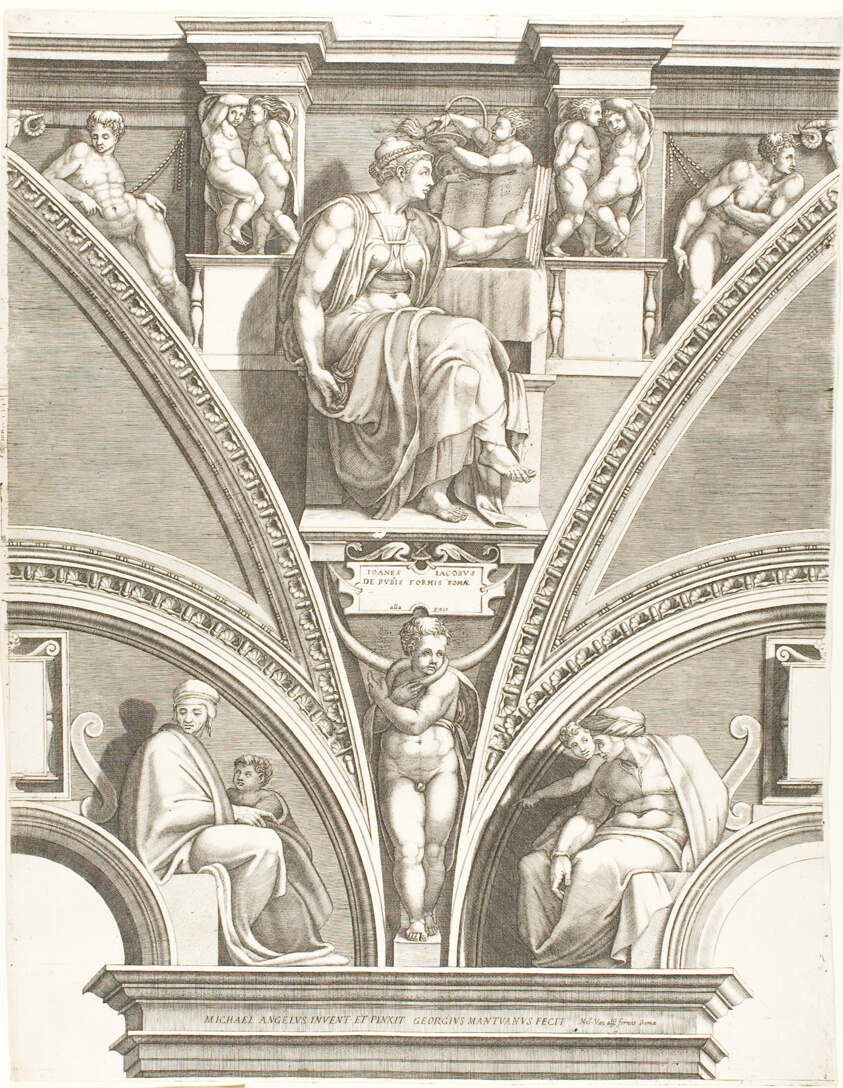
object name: Print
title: The Eritrean Sibyl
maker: Giorgio Ghisi (Italian, 1520-1582); after Michelangelo Buonarroti (Italian, 1475-1564)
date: c. 1570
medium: Engraving on ivory laid paper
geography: Italy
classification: engraving; print; prints and drawing